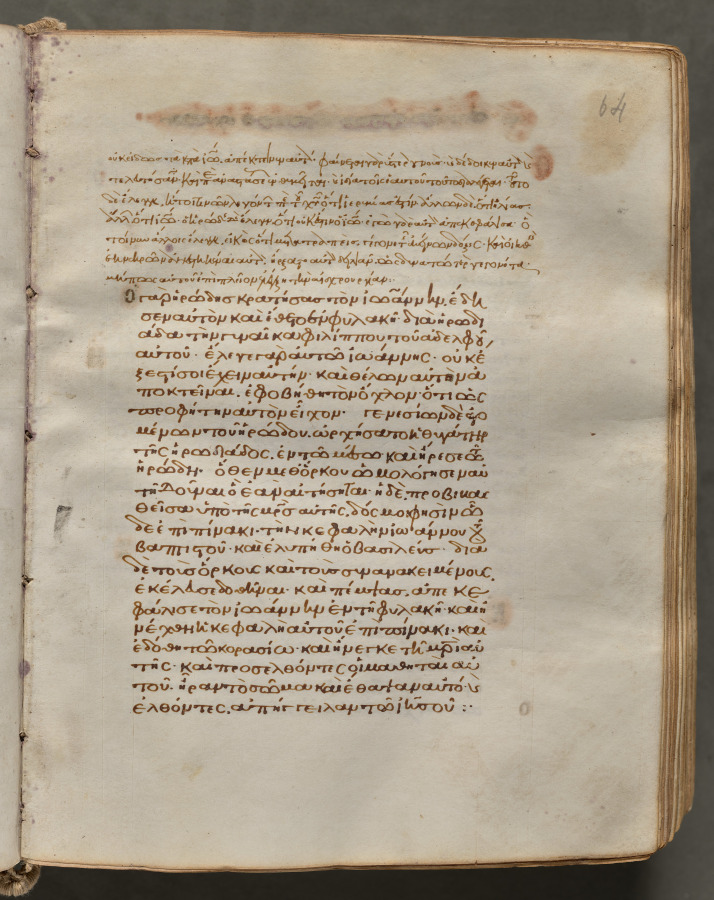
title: Text, folio 64 (recto), from a Gospel Book with Commentaries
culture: Byzantium, Constantinople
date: c. 1000–1100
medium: ink, tempera, and gold on vellum; leather binding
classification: Bound Volume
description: Each of the four gospels in this book opens on a page with brilliantly illuminated borders depicting the author of the text as well as birds-principally peacocks, symbols of the immortality of the soul-and fountains, representing the fountain of life and the salvation of the soul. This volume consists of 428 leaves with texts in Greek. Its level of sophistication suggests that it was probably written and decorated in a monastery in Constantinople.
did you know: Gospel Books were carried in procession through Byzantine churches.